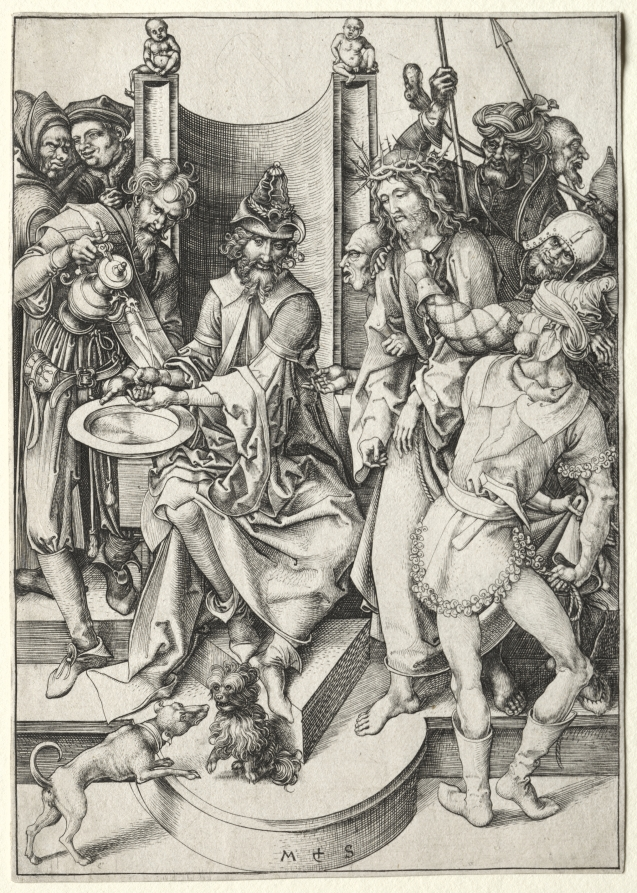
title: The Passion: Christ Before Pilate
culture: Germany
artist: Martin Schongauer (German, c. 1450–1491)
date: c. 1480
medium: engraving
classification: Print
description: Martin Schongauer's series of the Passion of Christ was his largest set of engravings, made around 1480, and extensively copied across Europe. It consists of twelve prints detailing the suffering of Christ in the last days of his life. Schongauer's version focuses on crowded scenes, grotesque physiognomies of Christ's tormentors, and great pathos in the composition. Here, Christ is led before Pontius Pilate. The Roman governor washes his hands in water which a servant is pouring from a ewer into a basin. Right after, he orders Christ's crucifixion.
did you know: The dog in this scene likely refers to late medieval Passion literature, which often compared Christ's tormentors to dogs.